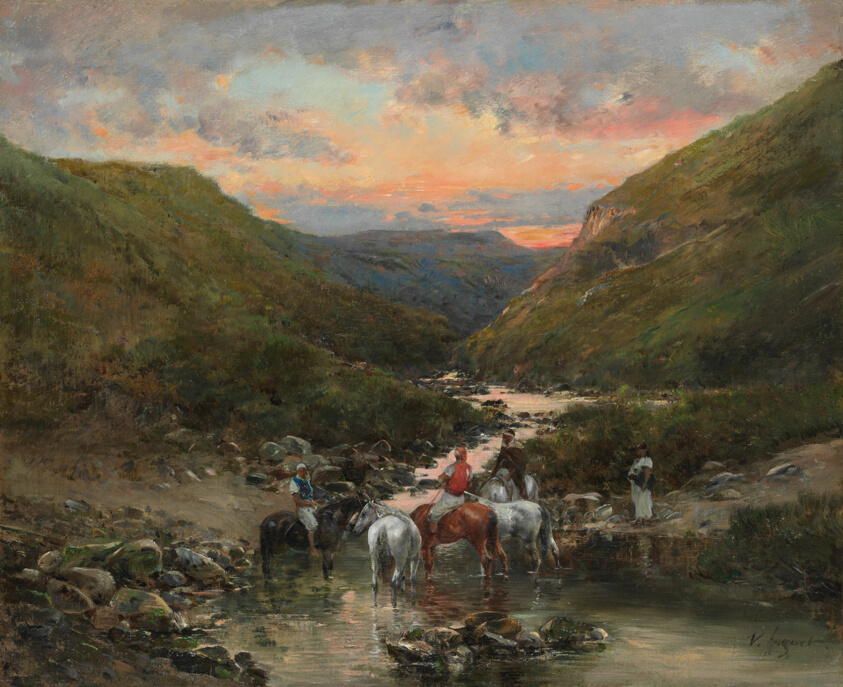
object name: Painting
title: Ravine Near Biskra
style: nineteenth century, 19th century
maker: Victor Pierre Huguet (French, 1835-1902)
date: c. 1895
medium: Oil on canvas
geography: France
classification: painting; french; oil on canvas; oil paintings (visual works); paint; european painting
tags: landscape, sky, sun, animals, rocks, mountains, mountain, men, water, river, horses